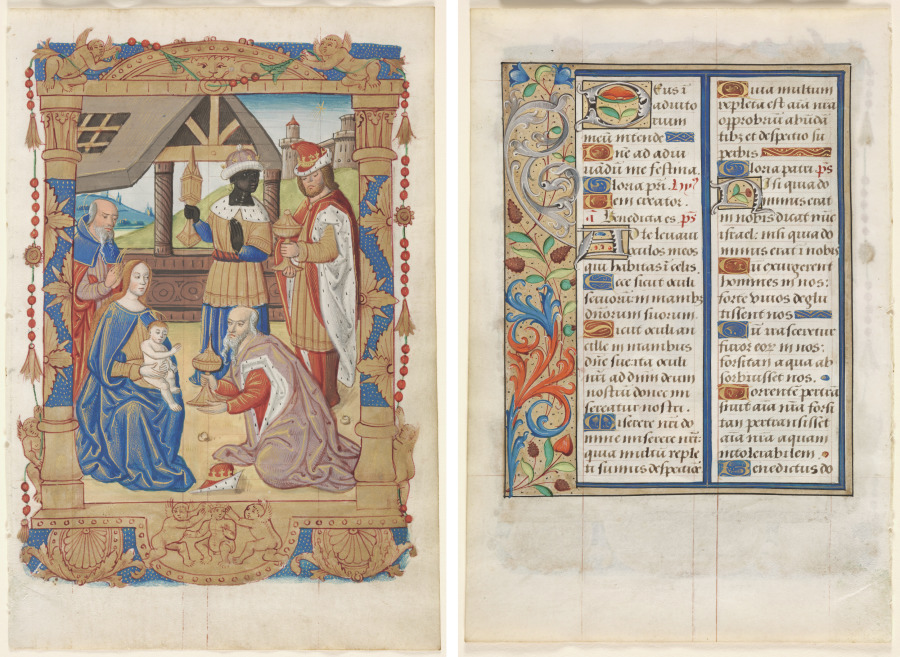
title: Leaf from a Book of Hours: Adoration of the Magi (recto) and Text with Illustrated Border (verso) (3 of 3 Excised Leaves)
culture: France, Rouen, 16th century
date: c. 1510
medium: ink, tempera and liquid gold on vellum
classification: Manuscript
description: Architectural frames, as in this miniature, became popular with the reception of Renaissance motifs north of the Alps. Winged putti, urns, garlands, masks, and scallop shells surround the main scene. These elements could be assembled in different ways so no two margins were identical. The figures themselves are still Gothic in style, with stiff folds in their clothes’ drapery. Rouen in the late 1400s and early 1500s was an established and important center of book production. Richly decorated literary texts and books of hours, such as the one which held this leaf, were made for sale next to the cathedral.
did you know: Part of a book of hours, this miniature opens the prayers to be recited at sext, or the sixth hour of the day.